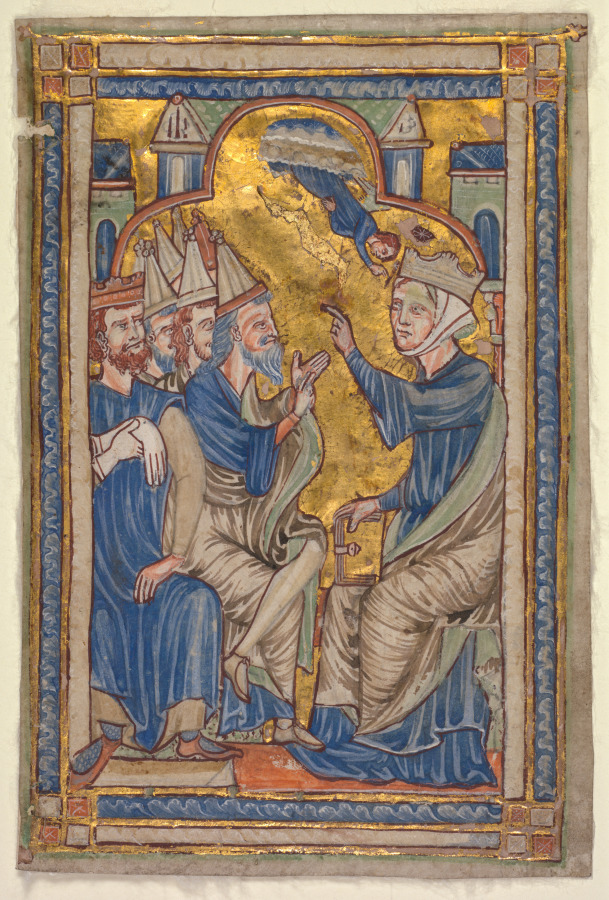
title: Miniature from a Compendium of Saints' Lives: Saint Catherine of Alexandria Disputing with the Fifty Philosophers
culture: Northeastern France, early 13th Century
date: c. 1200–1210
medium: tempera and gold on vellum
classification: Manuscript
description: This miniature depicts an incident in the life of Saint Catherine of Alexandria, one of the early martyrs of the Christian Church, who was renowned for her learning. In AD 305, the Roman emperor Maxentius (the crowned figure seated at the left) attempted to compel Catherine (seated at the right) to renounce her faith by forcing her to engage in a disputation or debate with the fifty pagan philosophers of Alexandria (signified by their pointed hats). The clever Catherine, however, succeeded in converting the philosophers to Christianity. In a rage, Maxentius ordered her execution. This miniature probably came from a manuscript of saints' lives or possibly a martyrology. The subject of this miniature would have appealed in the scholastic climate of northeastern France. Its dating and place of origin are supported by its strong stylistic relationship to the famous Ingeborg Psalter of about 1200, now in the Musée Condé in Chantilly.